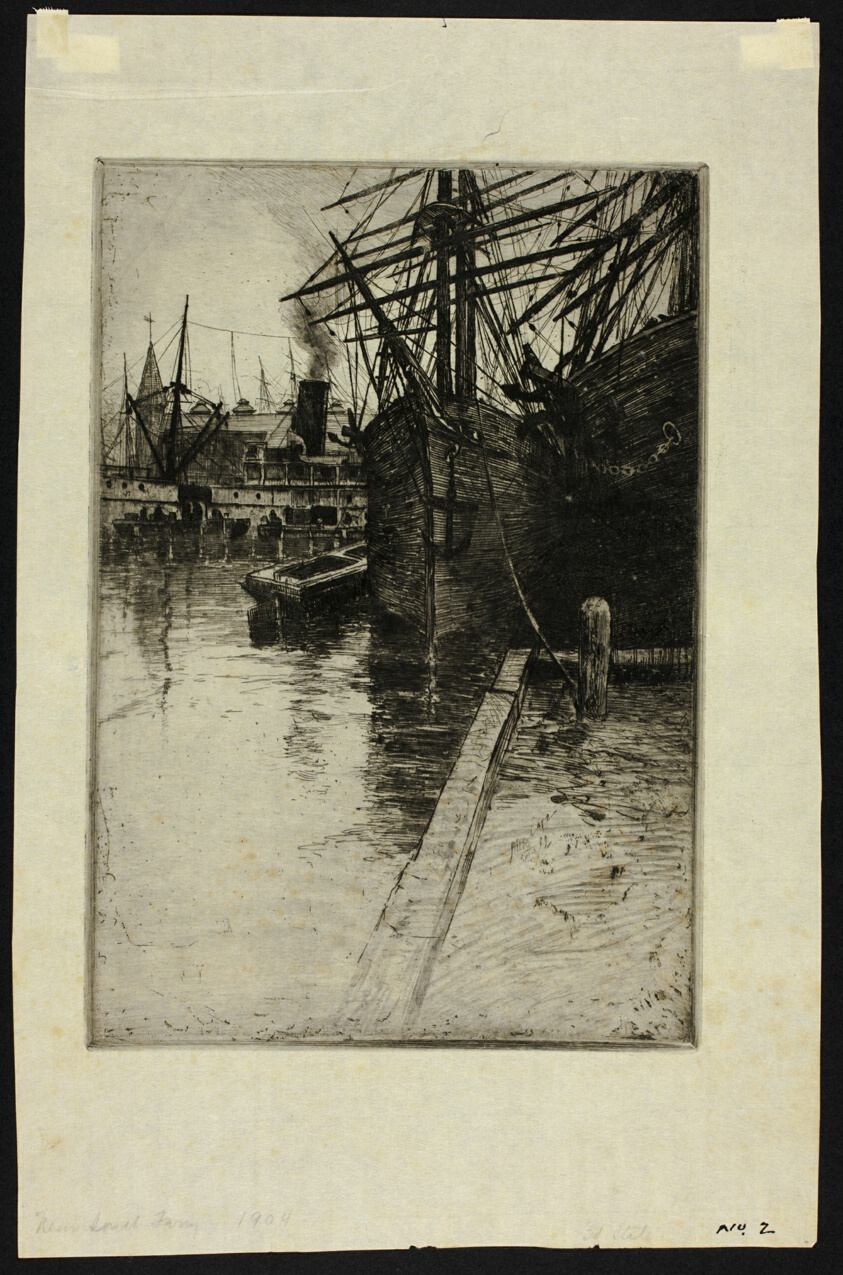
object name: Print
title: New South Ferry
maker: Charles Frederick William Mielatz (American, born Germany, 1864–1919)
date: 1904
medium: Drypoint in black with brush and watercolor on cream Japanese paper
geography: United States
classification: drypoint; print; prints and drawing